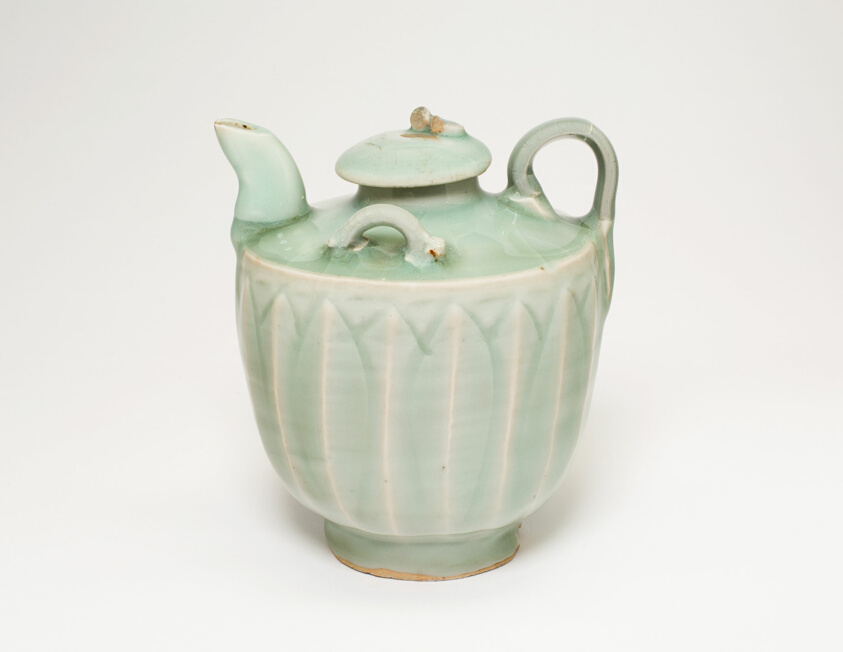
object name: Vessel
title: Ewer with Lotus Flower Petals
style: Chinese (culture or style)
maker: China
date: Song dynasty (960–1279), 13th century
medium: Celadon-glazed stoneware with underglaze molded, carved, and applied decoration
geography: China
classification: ewer (vessel); stoneware; vessel; asian art; ceramics